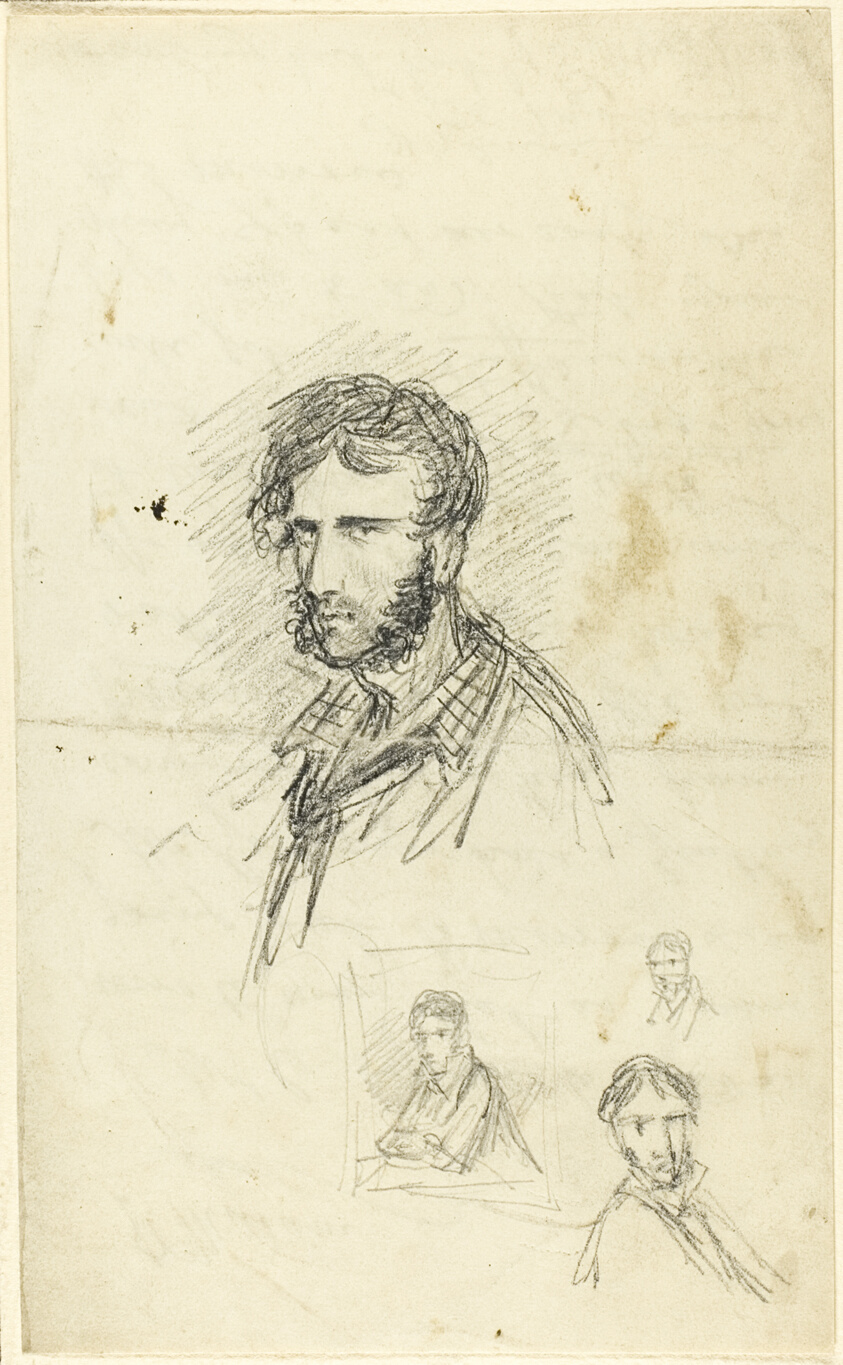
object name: Drawing and Watercolor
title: Self-Portrait with Three Sketches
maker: George Cruikshank (English, 1792-1878)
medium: Graphite, on ivory wove paper, tipped on cream wove paper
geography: England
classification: graphite; drawings (visual works); prints and drawing